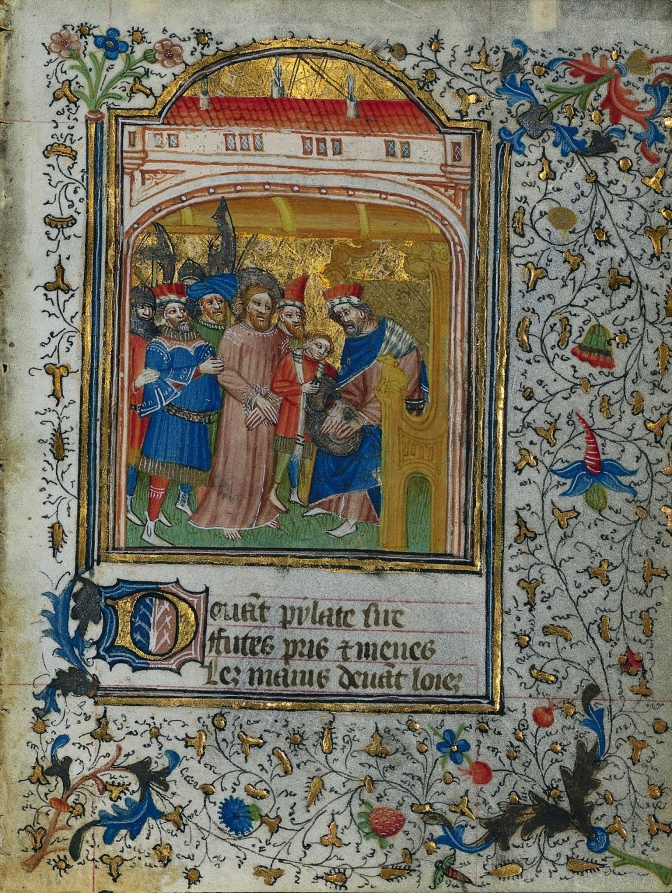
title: Christ before Pilate: Leaf from a Book of Hours (2 of 6 Excised Leaves)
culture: France, Metz, 15th century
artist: Henri d'Orquevaulx (French)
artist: or Workshop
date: c. 1420–30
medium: ink, tempera, and gold on vellum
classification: Manuscript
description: This leaf survives from what must have been an extraordinarily rich book of hours. The elaborate Passion cycle and Suffrages point to an important patron. Internal evidence within the original calendar and texts indicates that Metz was the probable place of production. Stylistically, the illuminations appear to come from the workshop of Henri d’Orquevaulx, a documented Metz manuscript painter. Compositionally, structurally, and stylistically, the miniatures suggest strong links to Netherlandish illumination. It is not known whether d’Orquevaulx came originally from the Netherlands or whether he simply worked or trained there at some point in his career.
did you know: Books of hours were often the first books from which children were taught to read.